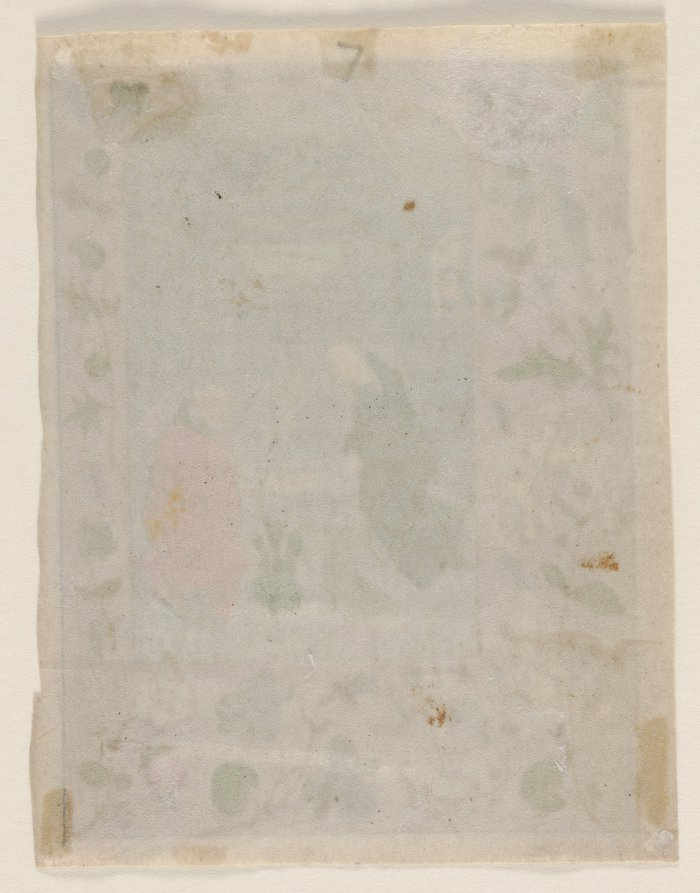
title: Leaf Excised from a Book of Hours: The Nativity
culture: Flanders, Ghent, 15th century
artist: Master of the First Prayerbook of Maximillian (Flemish, c. 1444–1519)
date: c. 1480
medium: ink, tempera and liquid gold on vellum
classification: Manuscript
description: This book, made by an artist of the Ghent-Bruges school of illumination, represents the culmination of Flemish book painting. Its main features were the use of rich colors, decorative and illusionistic effects, a love of landscape, and a strong sense of visual narrative. Its most distinctive innovation was the development of a new style of border decoration featuring realistic motifs which cast shadows onto colored grounds to create an effect of spaciousness. These motifs included a diverse assortment of flowers, butterflies, insects, birds, and sprays of acanthus foliage.